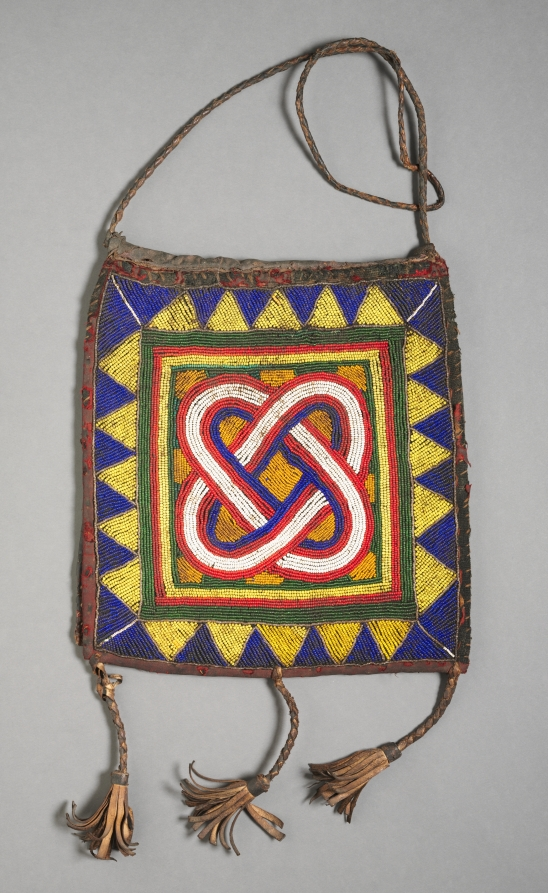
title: Diviner's Bag (Apo Ifa)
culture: Africa, West Africa, Nigeria, Yorùbá-style maker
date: 1900s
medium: Leather, glass beads, and natural fiber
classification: Textile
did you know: While used in the western part of Africa, the beads on this bag were imported from Europe.